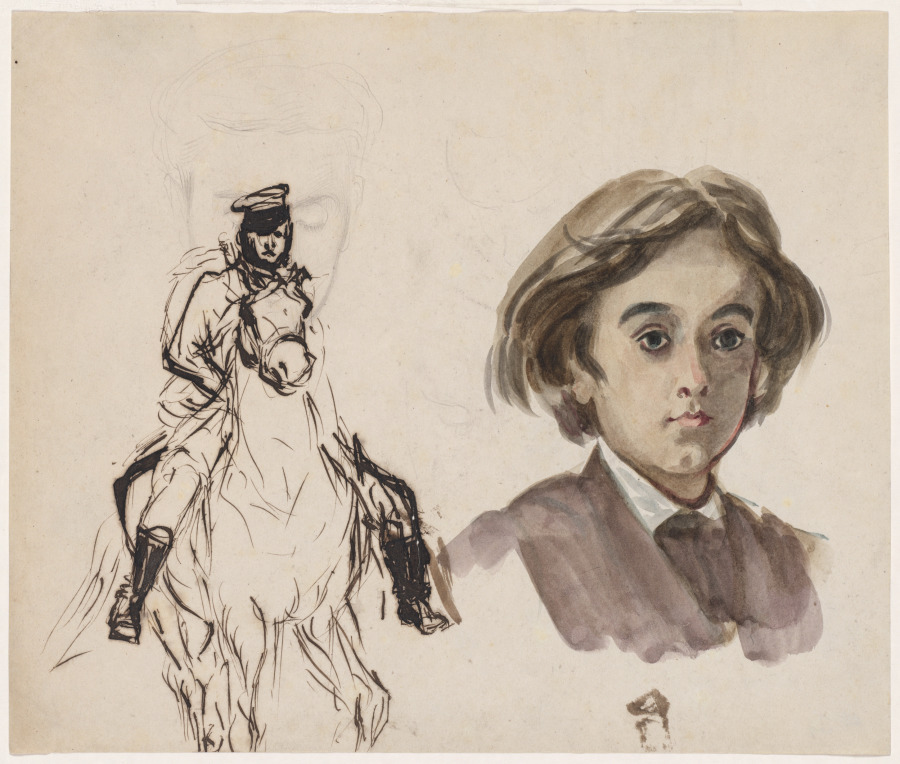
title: Study Sheet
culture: France, 19th century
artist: Alfred Dehodencq (French, 1822–1882)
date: c. 1870–80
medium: pen and dark brown ink, watercolor with graphite on lightweight wove paper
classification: Drawing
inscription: on verso, at lower left, in graphite: “#21”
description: Alfred Dohodencq was a prolific draftsman, often combining multiple sketches on a single page as seen here. At right, an intimate sketch of a boy—perhaps the artist’s son—appears in watercolor, alongside a cavalier drawn in pen and ink. Over the man and his horse, the artist lightly penciled in a face with closed eyes, perhaps reusing the sheet for another composition.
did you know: Dehodencq used drawing as a means to record his travels throughout France, Spain, and Morocco.